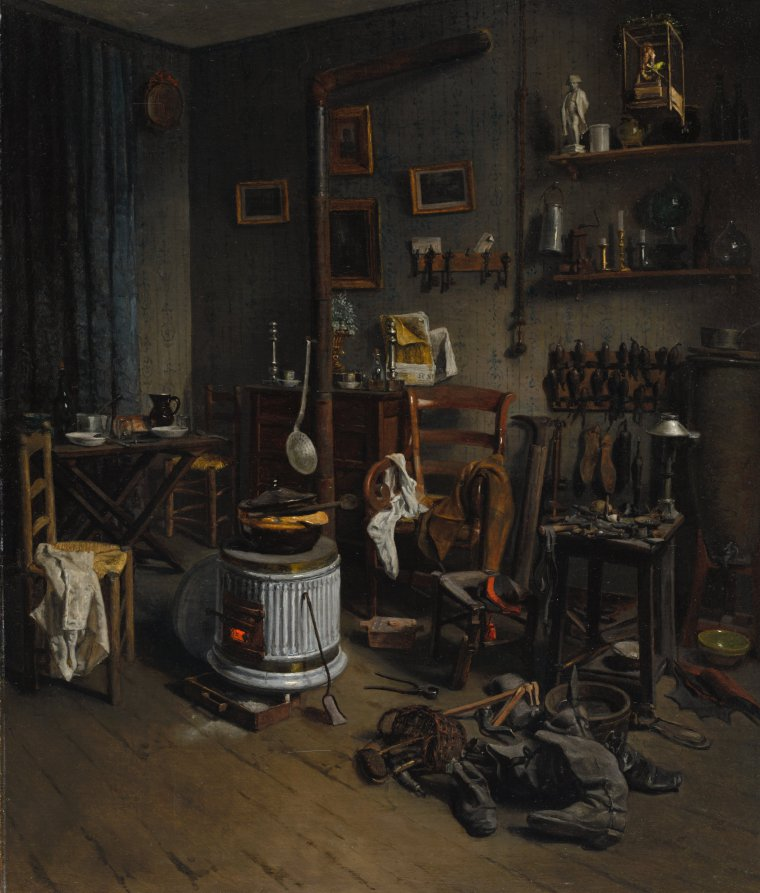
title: Cobbler's Quarters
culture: France, 19th century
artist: Jean-Alphonse Duplessy (French, 1817–after 1872)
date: 1860s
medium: oil on fabric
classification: Painting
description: This modest room is both the professional and personal domain of its inhabitant. Although the cobbler himself is not represented, he is nevertheless portrayed through all the details of his daily life. On the floor two pairs of boots wait to be repaired, surrounded by craftsman's tools. The pot-bellied stove in the middle of the room provides both heat and a place for cooking meals to be eaten at the folding table in the background at the left. The curtain behind the table probably hides an alcove with the cobbler's bed. A small statuette of Napoleon on the shelf at the upper right suggests the cobbler's political views. Next to it hangs a cage containing a green parakeet. Today the bird would undoubtedly be replaced by a radio, a necessary fixture to keep manual laborers company as they work. Little is known of Duplessy, who studied and worked in Paris, except that he concentrated on still-life painting. His interest in this subject can be seen in the careful rendering of object groupings in this scene. No records of the artist's life exist after 1872, the last year his work was shown at the annual Salon exhibition.